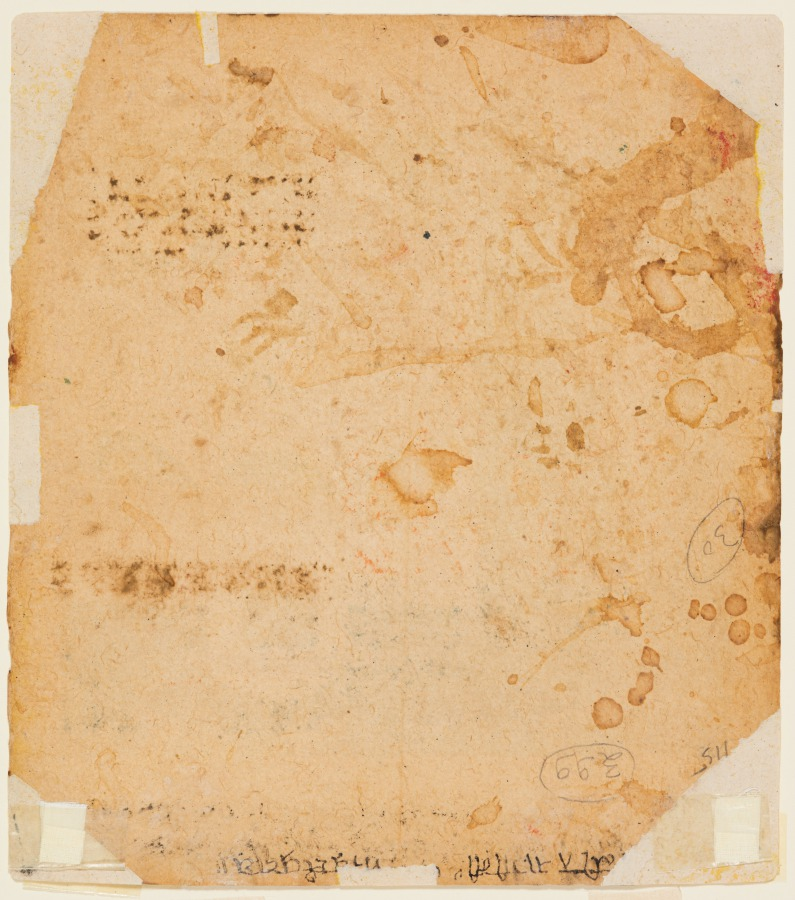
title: The Lover Leaves Wistfully in the Morning after a Passionate Tryst: Lalit Ragini, from a Ragamala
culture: Central India, Madhya Pradesh, Malwa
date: c. 1600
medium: Gum tempera and gold on paper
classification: Painting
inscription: Three line Sanskrit inscription in the yellow text panel; short Sanskrit inscription on the reverse. Yellow border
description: After a night of lovemaking, the lover leaves his sleeping consort early in the morning. He thoughtfully turns his head to take a last look at his beautiful beloved before departing. The heroine, unaware of her lover’s egression, slumbers on the footed bed with boldly patterned textile. The break of dawn has been depicted with the depiction of blue sky overlapping the black background.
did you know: The hero carries two garlands in his hands as souvenirs of the previous night.